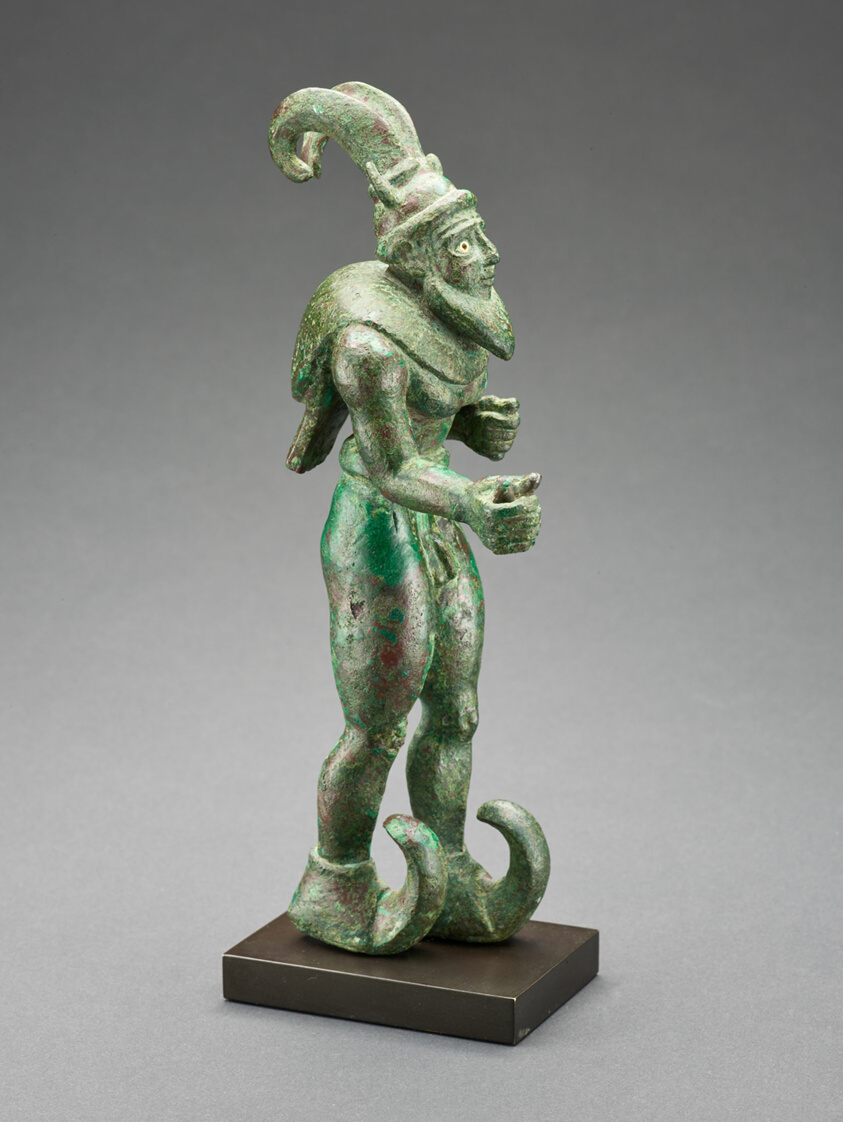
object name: Religious/Ritual Object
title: Statuette of a Striding Figure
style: proto-elamite, mesopotamian, elamite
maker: Mesopotamian or Iranian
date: 3000-2800 BCE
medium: Copper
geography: Iraq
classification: ritual objects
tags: ritual, headdresses